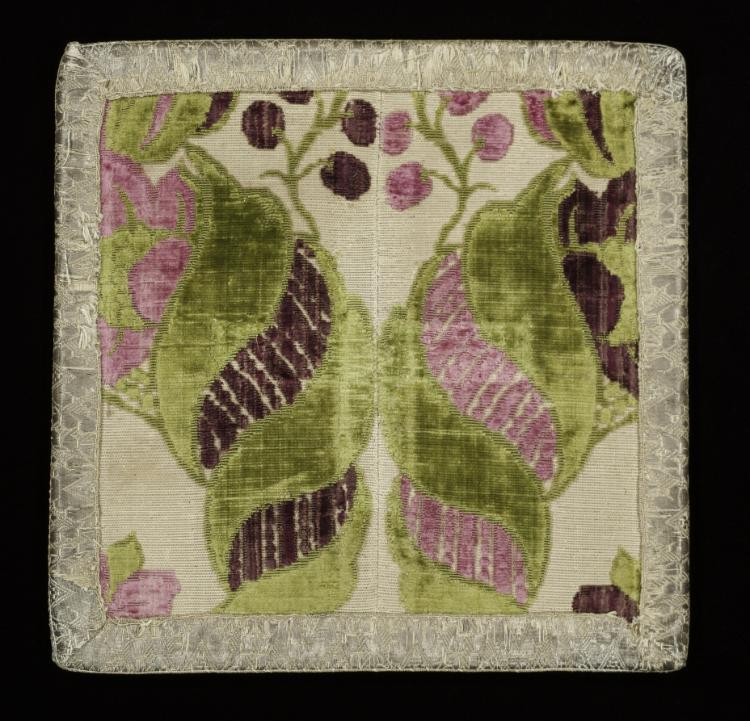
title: Burse (Corporal Case)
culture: Italy, Genoa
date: 1600s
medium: Silk velvet: cut and uncut, metal thread lace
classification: Velvet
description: This sumptuous polychrome velvet displays a central vase with abundant flora and exotic leaves flanking curving blossoming fronds on a gilt-metal thread ground. The pattern was created with five colors of cut and uncut (loops) velvet pile. Only the pile warps for the lush green velvet occur across the entire cloth, while each additional color appears in vertical stripes—crimson, peach, rose, and purple. These widely acclaimed velvets from Genoa were the most colorful woven in Europe. Both the long stole and the shorter maniple are insignia of the office of deacons, priests, and the higher clergy. The stole was worn under a chasuble according to the office and the maniple was hung on the left forearm. The burse is a stiff receptacle in which the folded corporal, a white linen cloth on which the sacred bread and chalice are placed during the Mass, is carried to and from the altar. The upper fabric matches the chasuble, the bottom is a plain silk, and the interior has an obligatory linen lining.